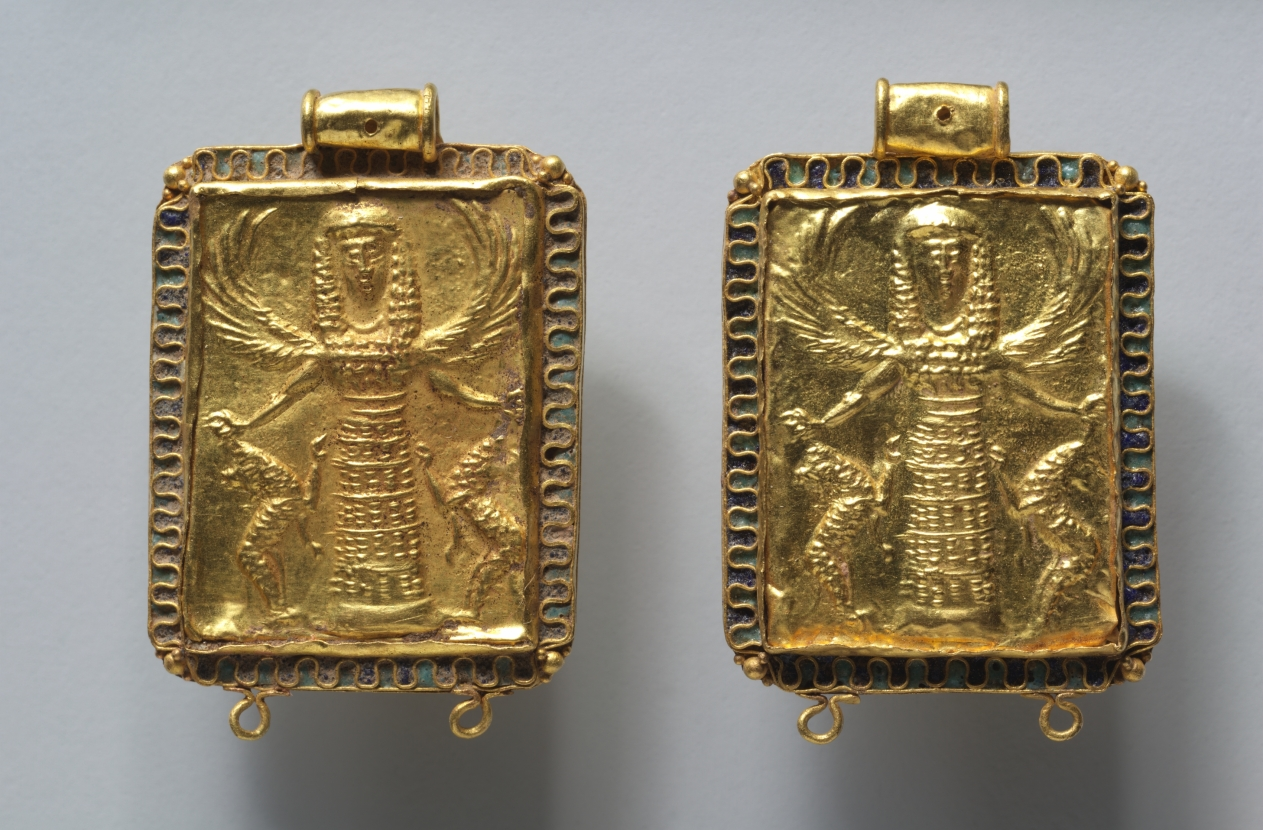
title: Daedalic Pendant with Potnia Theron (Mistress of the Animals)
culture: Eastern Greece, Rhodian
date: 650–600 BCE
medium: gold and glass-like substance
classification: Metalwork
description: This pendant, received in 2001 (2001.157), was probably originally from the same necklace as the nearly identical pendant acquired by the museum in 1999 (1999.88). Both depict the goddess Potnia Theron, the “mistress of the animals,” a deity sometimes associated with the Greek goddess Artemis. The goddess stands in a frontal pose with upswept wings, one curving above each shoulder. A feline rears up on either side of her, pulled by a leash held in each of her clenched fists.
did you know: The central decoration was likely made by burnishing a sheet of gold on a wood, stone, or ceramic form.